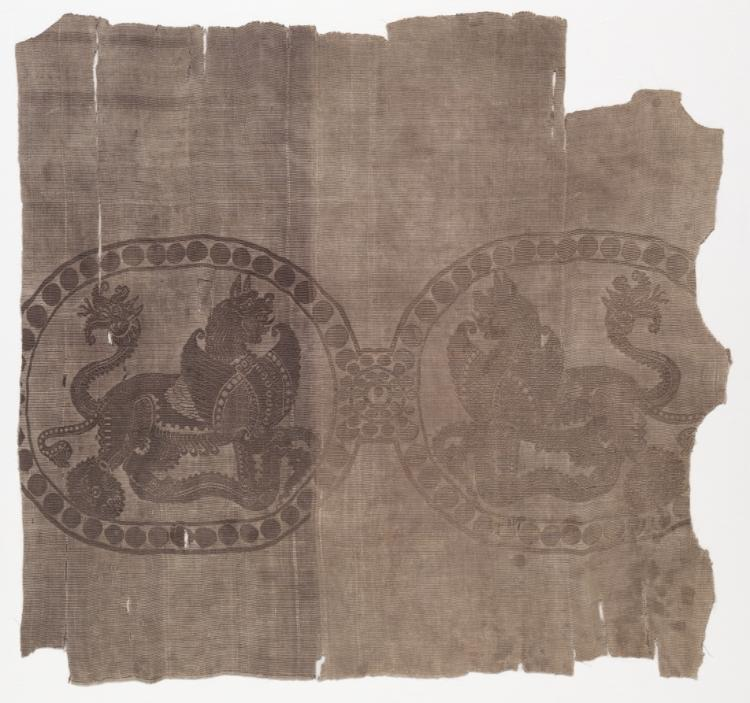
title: Fragment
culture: Iraq or Iran, in the style of the Buyid period (945–1055)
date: before 1968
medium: Silk: twill weave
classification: Textile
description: The fragment has large ovals containing combatant griffins and serpents framed with pearled borders and linked with round pearled medallions.